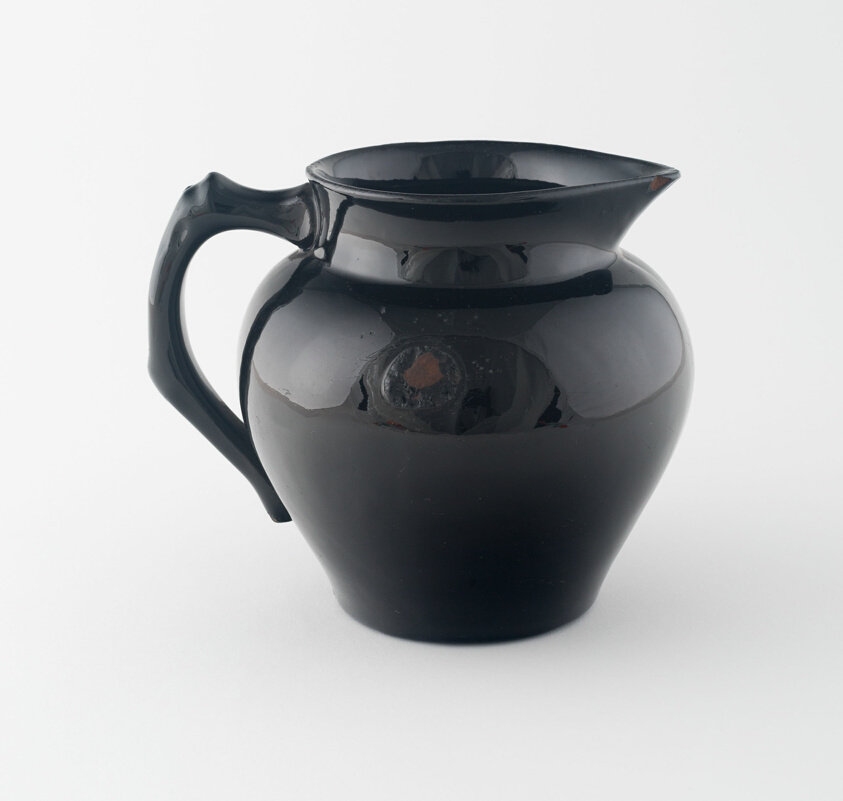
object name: Decorative Arts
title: Creamer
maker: Artist unknown (American, 18th–19th century); Possibly Pennsylvania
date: 1790–1820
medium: Earthenware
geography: Pennsylvania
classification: creamer; porcelain; american decorative arts; american arts; ceramics; decorative arts